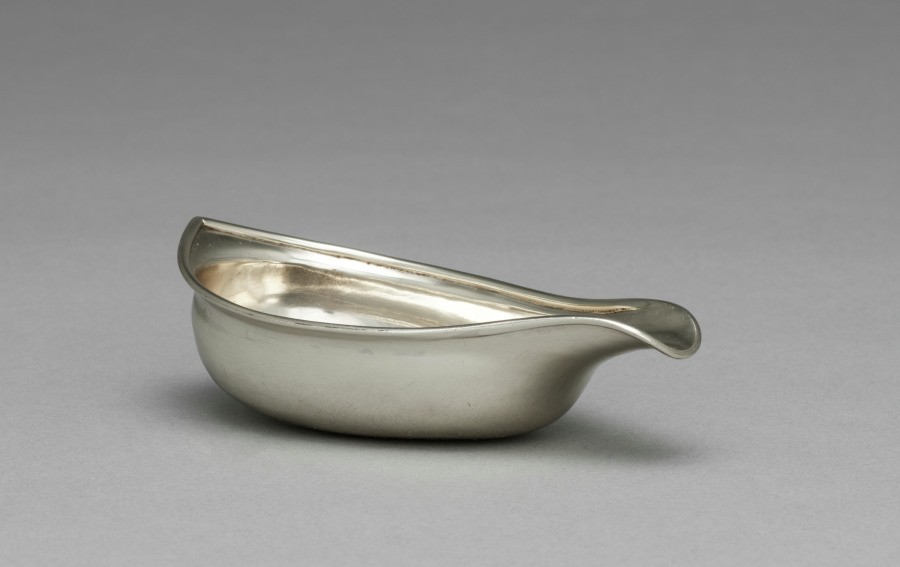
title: Pap Boat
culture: America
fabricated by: Cary Dunn (American, 1798)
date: c. 1790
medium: silver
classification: Silver